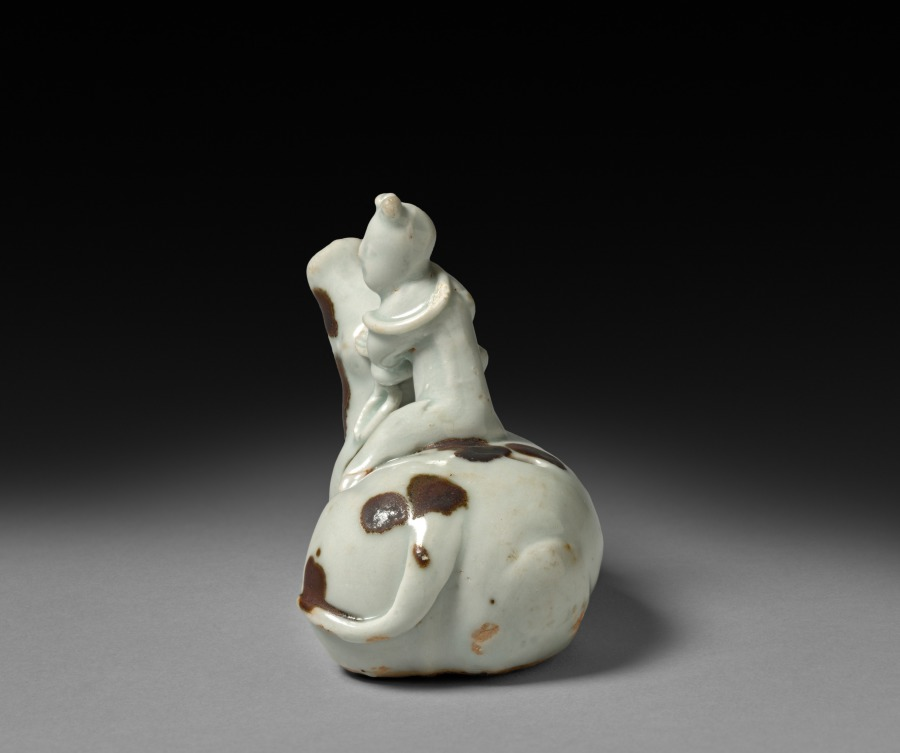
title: Buffalo with Rider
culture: China, Jiangxi Province, Jingdezhen kilns, Yuan dynasty (1271–1368)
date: early 1300s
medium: glazed porcelain with iron spots, qingbai ("blue-white") ware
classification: Ceramic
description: Boys tending buffalos were associated with a carefree life in the countryside free from the duties of officialdom. Water droppers contained water that was used to dissolve ink sticks into liquid ink for brush painting and writing.